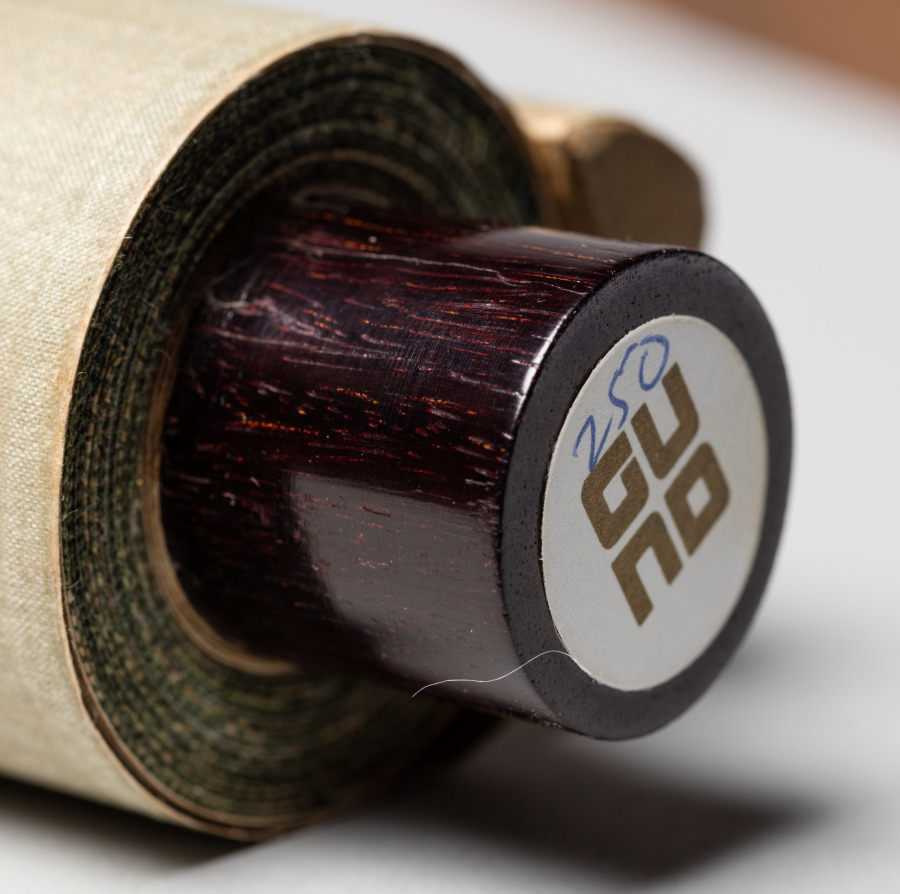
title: Gibbons Reaching for the Moon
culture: Japan, Edo period (1615–1868)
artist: Kano Tan’yū (Japanese, 1602–1674)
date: 1600s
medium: Hanging scroll; ink and light color on silk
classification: Painting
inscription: signed: "Tan'yūsai hitsu"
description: Long-armed gibbons form a chain to reach down from a tree, hoping to touch what they believe is the moon. In fact, the orb remaining beyond their grasp is the full moon’s reflection in the still surface of a pond or lake. The image is a common metaphor for the deluded mind in Buddhist thought. Gibbons do not live in Japan but were known to Japanese painters of the premodern era through paintings brought from China.